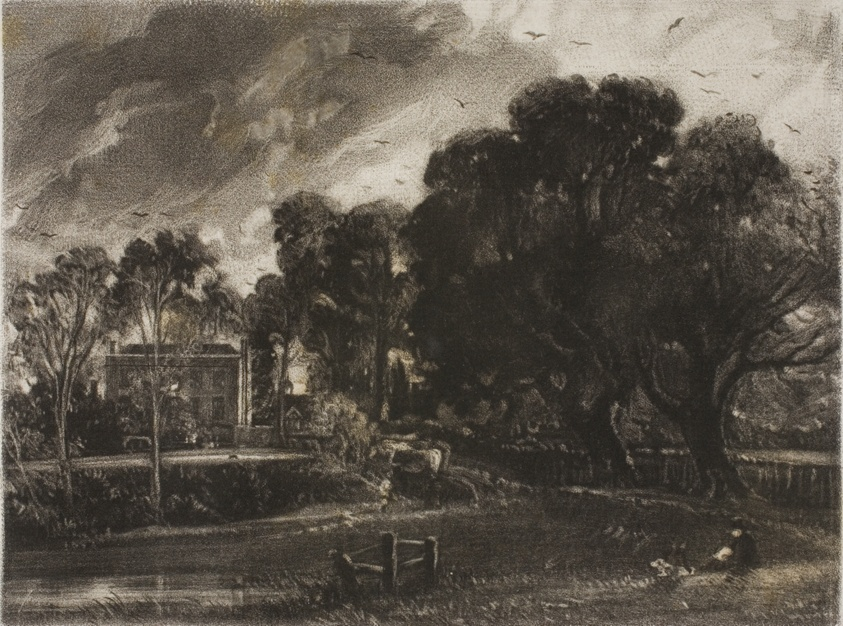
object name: Print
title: Frontispiece, to Mr. Constable's English Landscape, East Bergholt, Suffolk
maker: David Lucas (English, 1802-1881); after John Constable (English, 1776-1837)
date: 1830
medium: Mezzotint on paper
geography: England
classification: mezzotint; print; prints and drawing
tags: landscapes